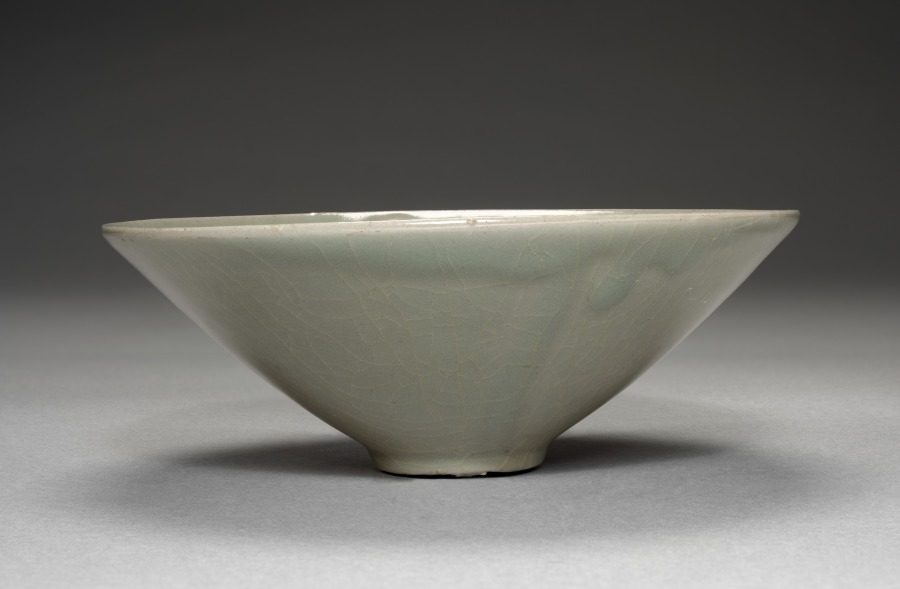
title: Bowl with Cloud Design in Relief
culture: Korea, Goryeo dynasty (918–1392)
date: 1100s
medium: glazed porcelain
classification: Ceramic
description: As early as the 600s, the practice of drinking tea and wine became an important part of elite leisure culture in Korea. A wide bowl like this example was especially suitable for drinking powdered tea shaved from a compressed tea cake, the most commonly enjoyed type during the Goryeo period. The pale bluish green glaze indicates that this tea bowl was created in the 12th century, the time when the production of celadon reached its technical peak.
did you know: Kangjin and Buan kilns in Jeolla province were the two major production centers for celadon wares during the Goryeo period (918–1392).